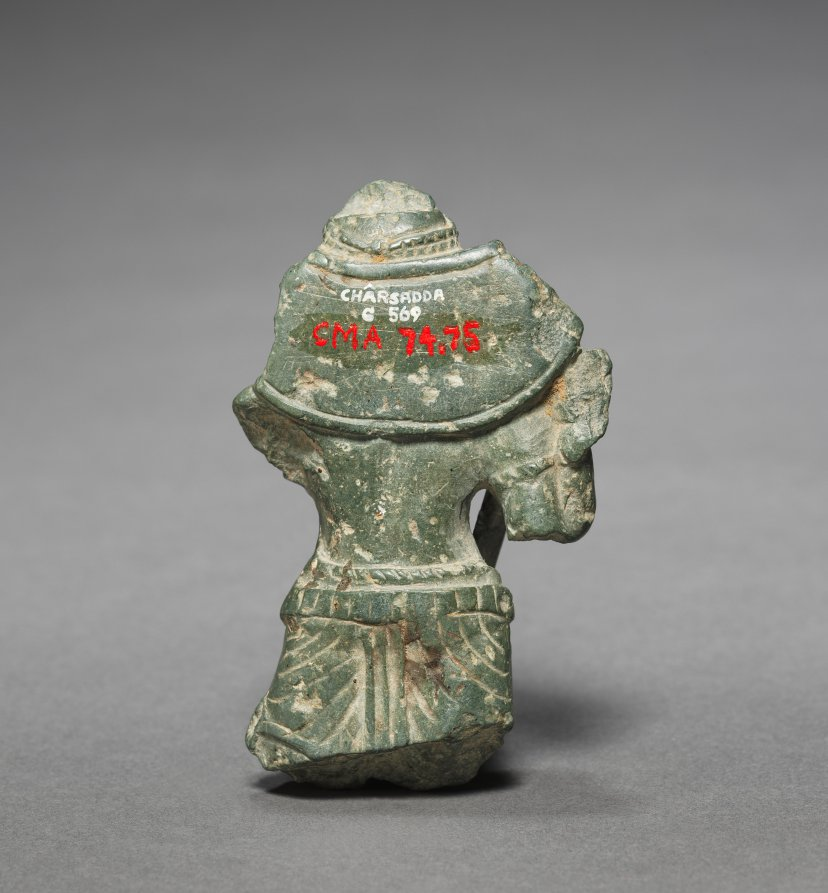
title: Karttikeya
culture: India, Kashmir, c. 5th Century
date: 400s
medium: stone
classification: Sculpture